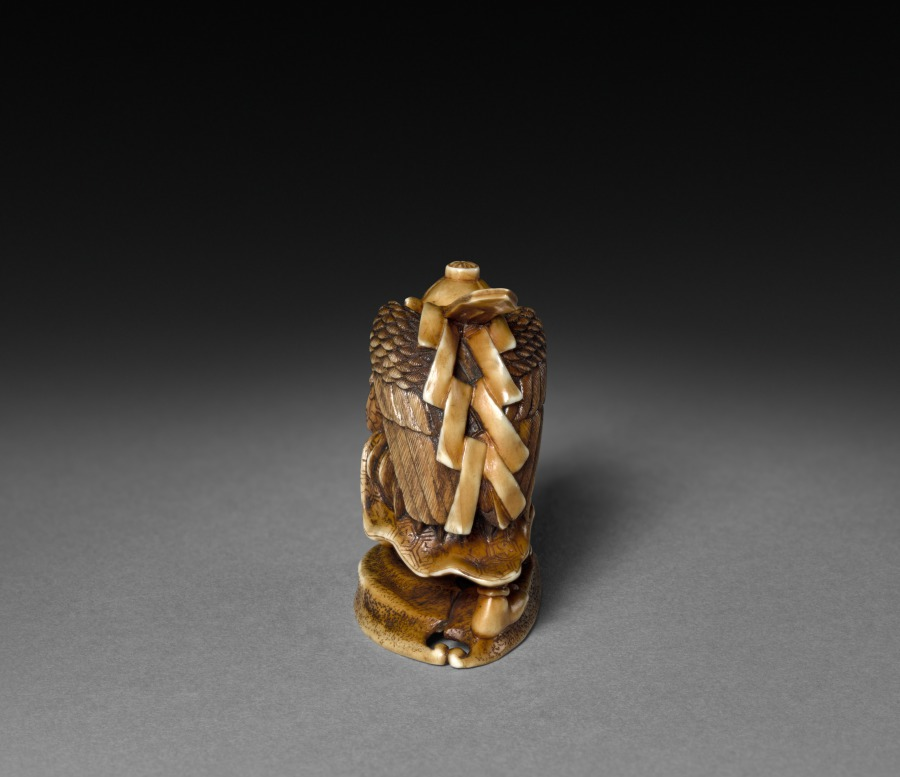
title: Tengu Travelling as a Priest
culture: Japan, Edo period (1615–1868)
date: early to mid-1800s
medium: ivory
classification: Netsuke